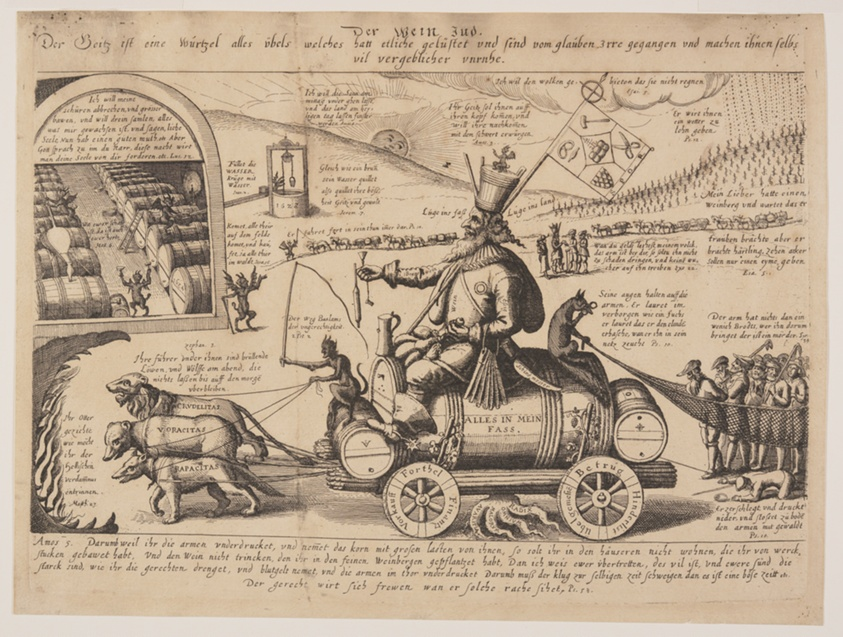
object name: Print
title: Der Wein Jud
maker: Jan van der Heyden (Dutch, 1637–1712)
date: 1628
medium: Etching on ivory laid paper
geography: Netherlands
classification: print; paper; prints and drawing; etching